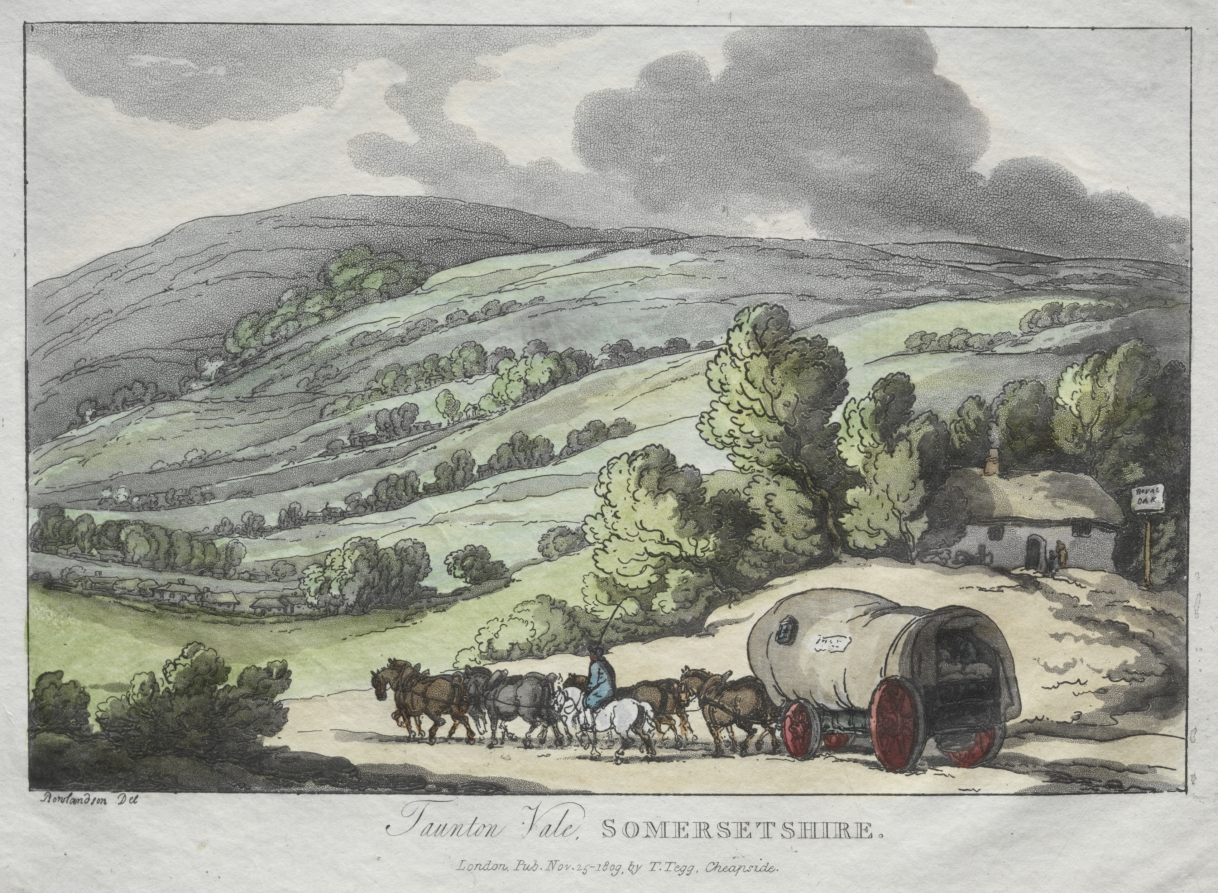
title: Rowlandson's Sketches from Nature: Taunton Vale, Somersetshire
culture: England, early 19th Century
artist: Thomas Rowlandson (British, 1756–1827)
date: 1809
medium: etching, hand colored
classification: Print